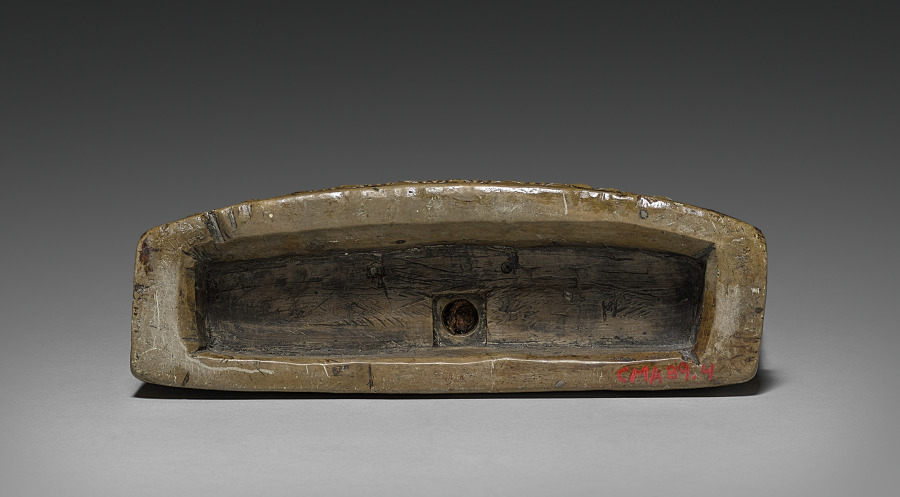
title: Stele with Sadaksari-Lokesvara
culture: Tibet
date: c. 1200s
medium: Kaolin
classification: Sculpture